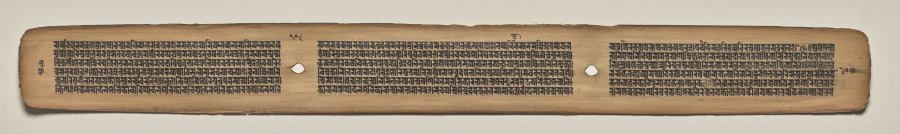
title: Text, Folio 109 (verso), from a Manuscript of the Perfection of Wisdom in Eight Thousand Lines (Ashtasahasrika Prajnaparamita-sutra)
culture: Eastern India, Bihar, Vikramashila Monastery. Painting: Nepal, Kathmandu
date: Sunday, September 14, 1119 (year 239 of the Newar Samvat in the month of Ashvina)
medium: gum tempera and ink on palm leaves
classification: Painting